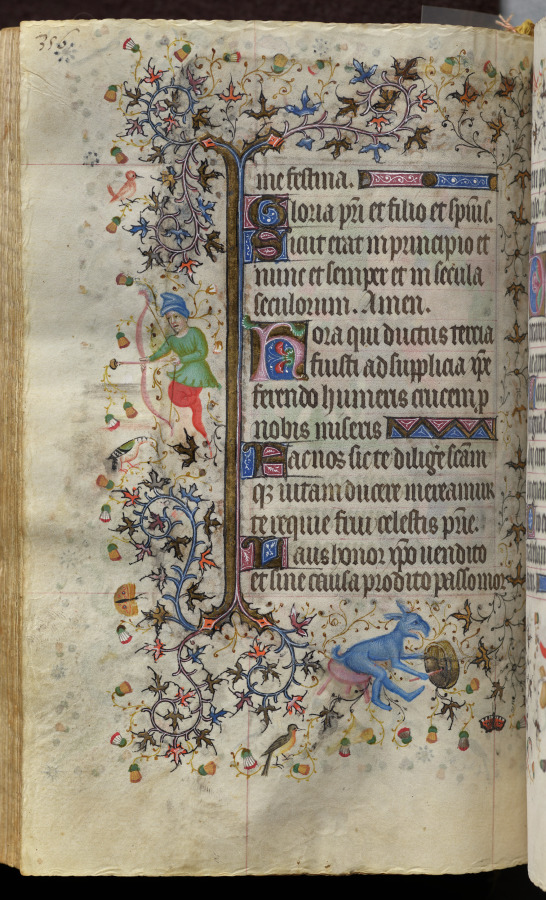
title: Hours of Charles the Noble, King of Navarre (1361-1425): fol. 173v, Text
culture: France, Paris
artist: Master of the Brussels Initials and Associates (French)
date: c. 1405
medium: ink, tempera, and gold on vellum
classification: Bound Volume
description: This precious volume was obviously highly prized by its owner, the French-born King of Navarre, who had his coat of arms painted on no less than twenty folios. Rather than directly commissioning this manuscript from a specific workshop, it seems that Charles the Noble acquired his book of hours -- perhaps ready-made for the luxury market -- while on a trip to Paris in 1404-05. A collaborative effort, six painting styles are evidenced within the pages of this codex, those of two Italians, two Frenchmen, and two Netherlanders. The painter who was responsible for the planning and decoration of the book, and who produced seventeen of the large miniatures, was a Bolognese artist known as the Master of the Brussels Initials. His principal assistant, responsible for most of the borders, was a Florentine who signed his name "Zecho" da Firenze on folio 208 verso.